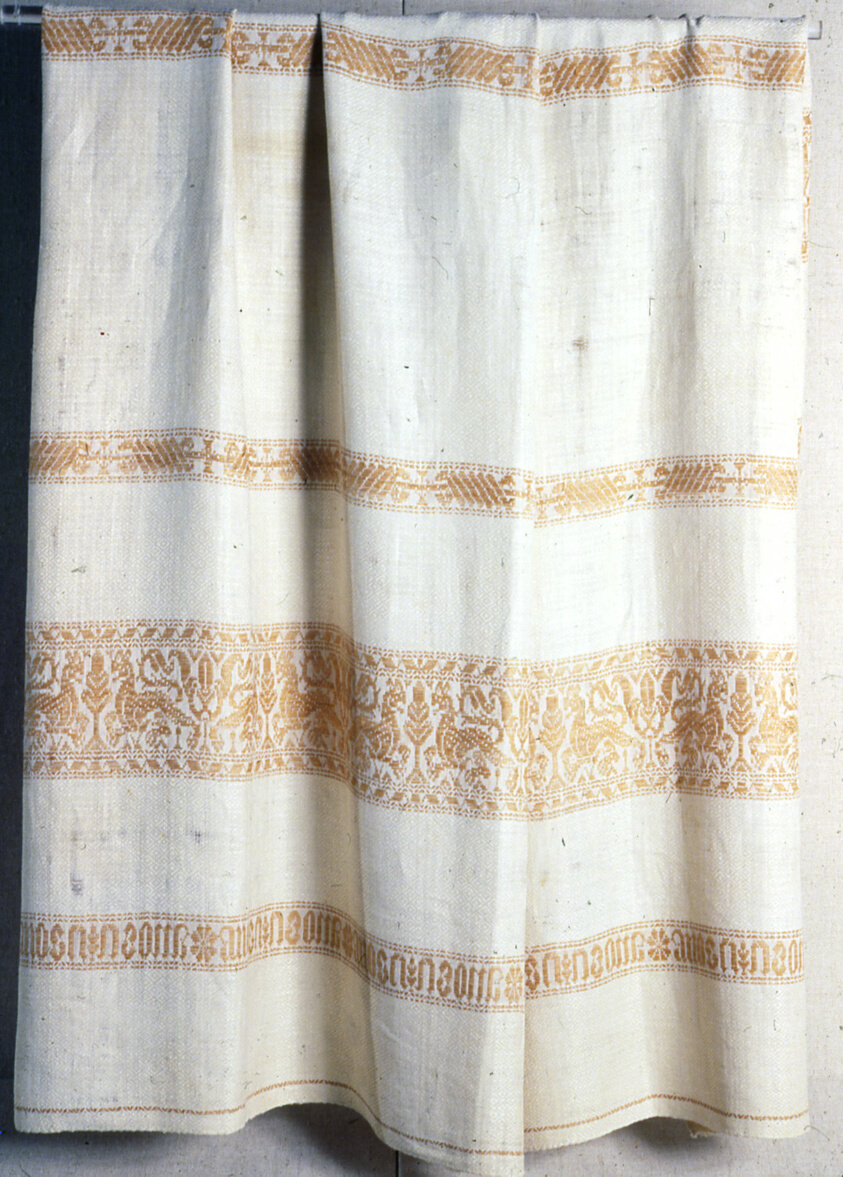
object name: Textile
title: Tablecloth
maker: Germany, Nüremberg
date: c. 1500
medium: Linen, compound weave with insertions of brocaded linen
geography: Nuremberg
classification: textile; weaving